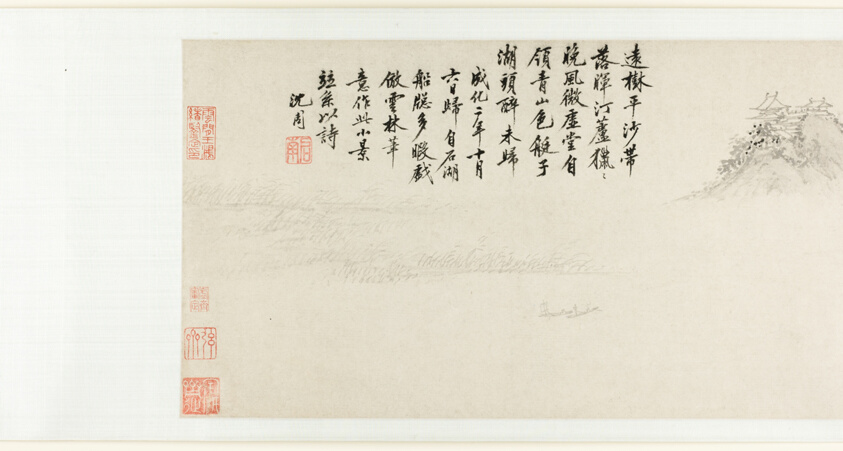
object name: Painting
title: Return to Stone Lake 石湖歸棹圖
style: Chinese (culture or style)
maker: Shen Zhou, 沈周; Chinese, 1427-1509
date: Ming dynasty (1368–1644), dated 1466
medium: Handscroll; ink on paper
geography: China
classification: handscroll; painting; asian art